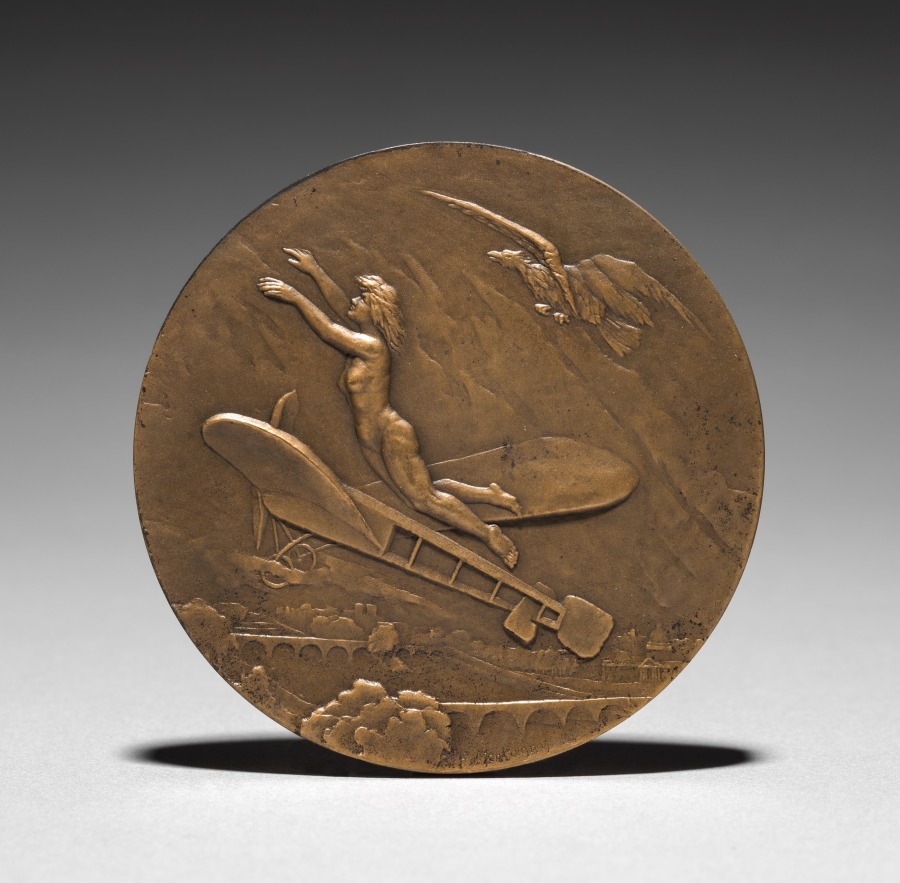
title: Medal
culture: France, 19th century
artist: F. Montagny (French)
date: c.1920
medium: bronze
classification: Metalwork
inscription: inscribed: F. Montagny.